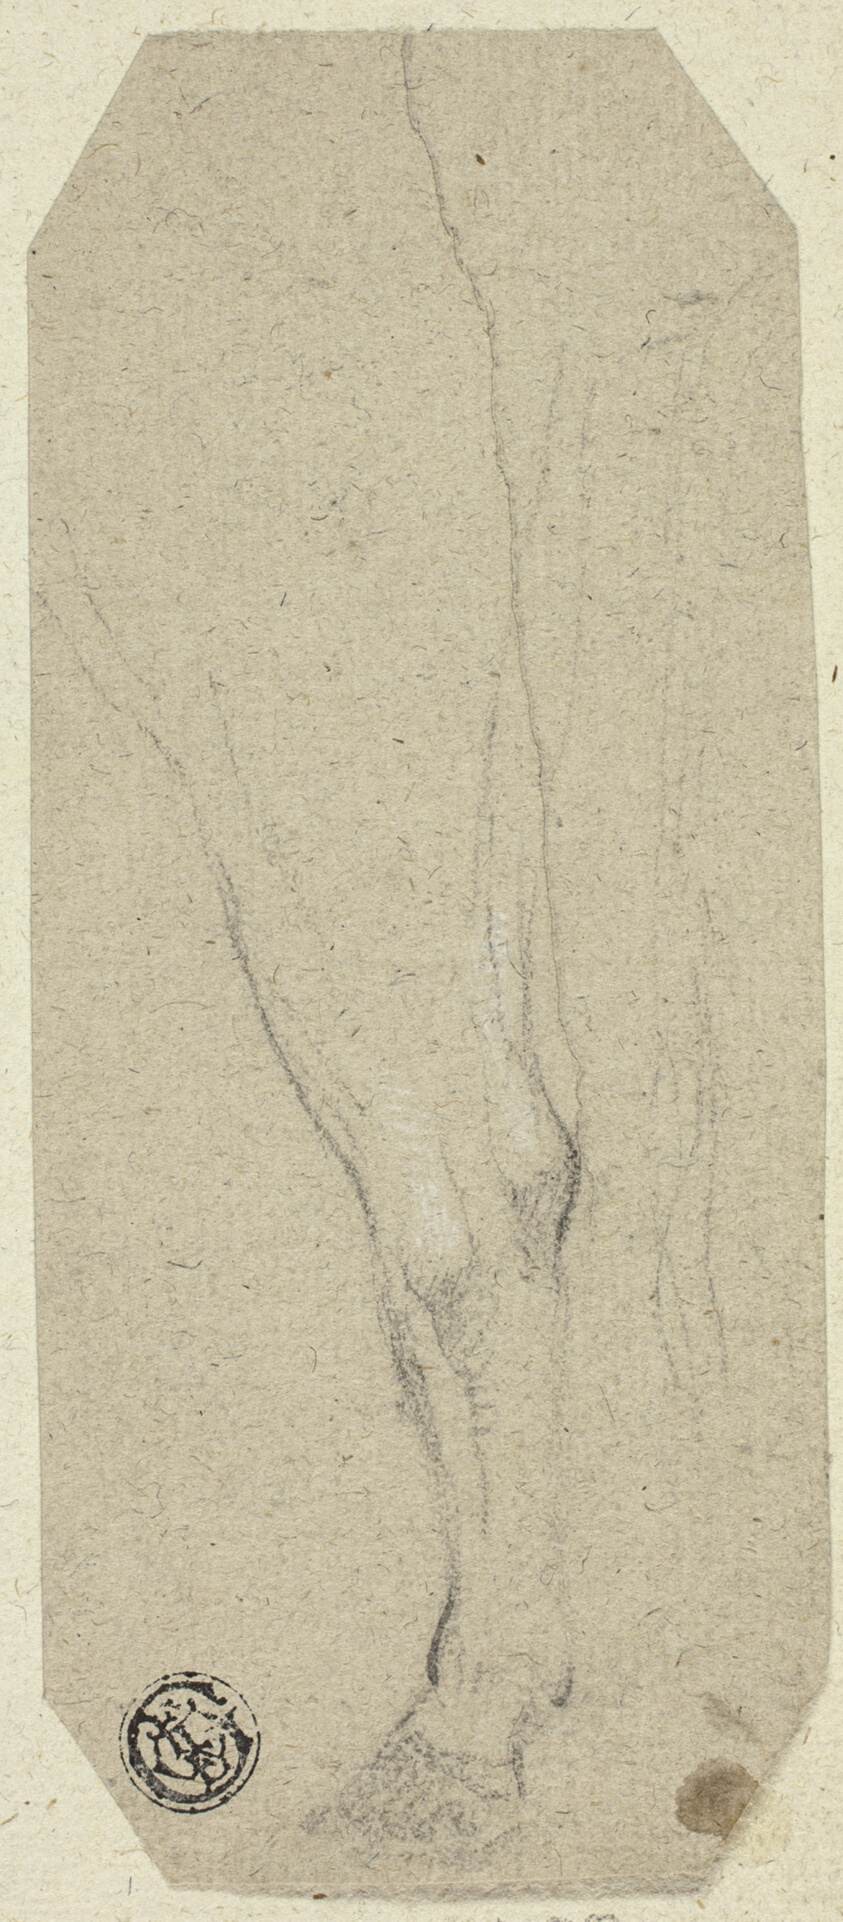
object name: Drawing and Watercolor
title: Cow's Leg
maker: Unknown Artist; English, 19th century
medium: Charcoal on buff laid paper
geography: United Kingdom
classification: charcoal; paper; drawings (visual works); prints and drawing